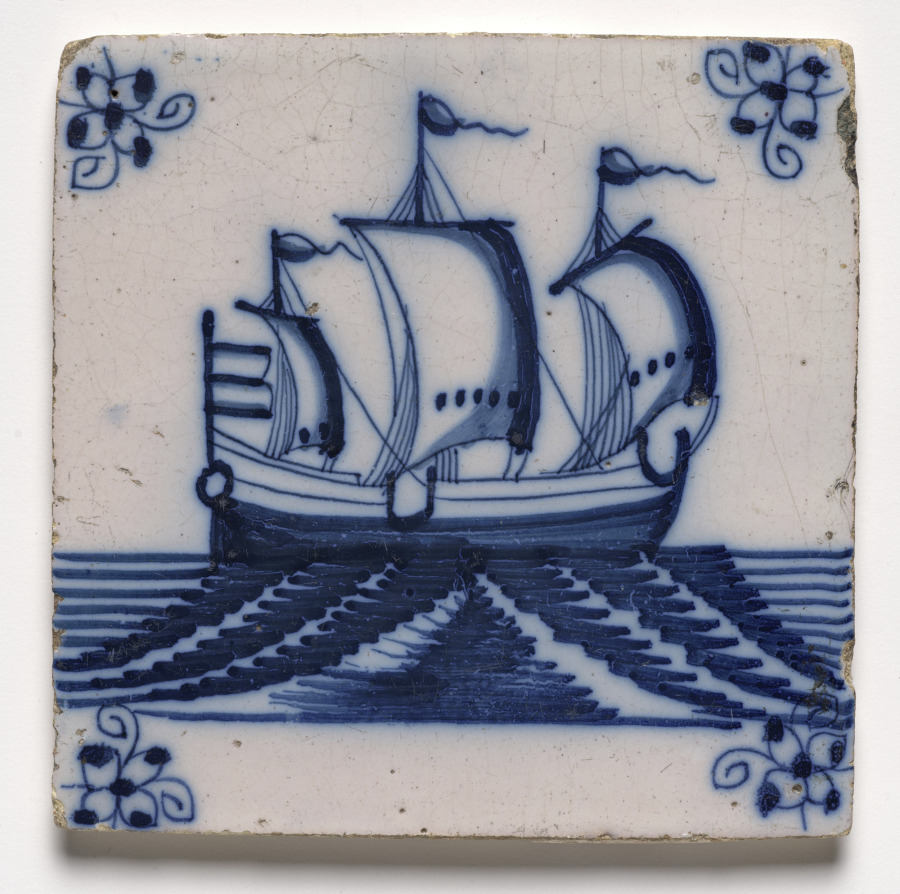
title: Tile- Ship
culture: Netherlands, Holland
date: c 1700s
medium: glazed ceramic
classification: Ceramic